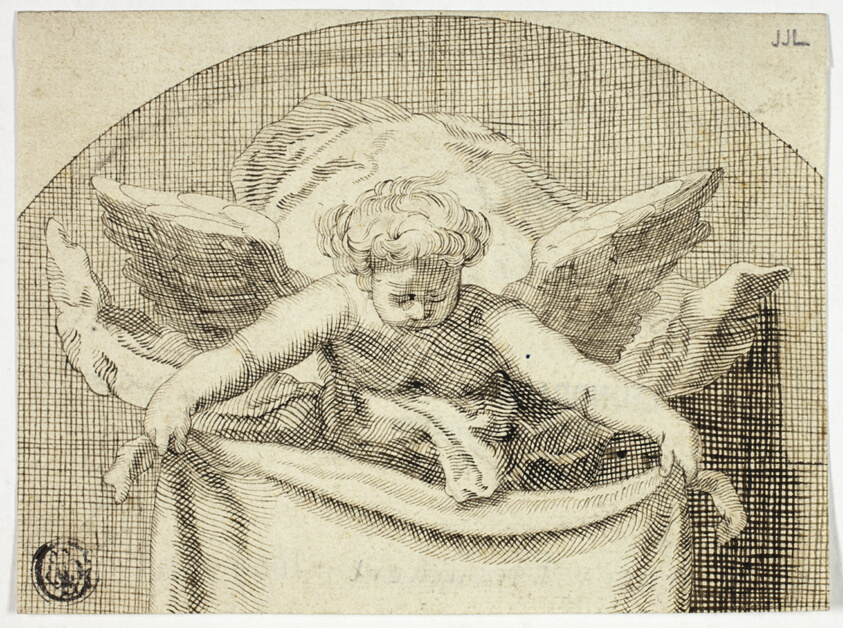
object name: Drawing and Watercolor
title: Putto Holding Sudarium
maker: Possibly after Cornelis Bloemaert, II; Dutch, 1603-1689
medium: Pen and brown ink, on ivory laid paper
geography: Holland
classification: pen and ink drawings; drawings (visual works); prints and drawing